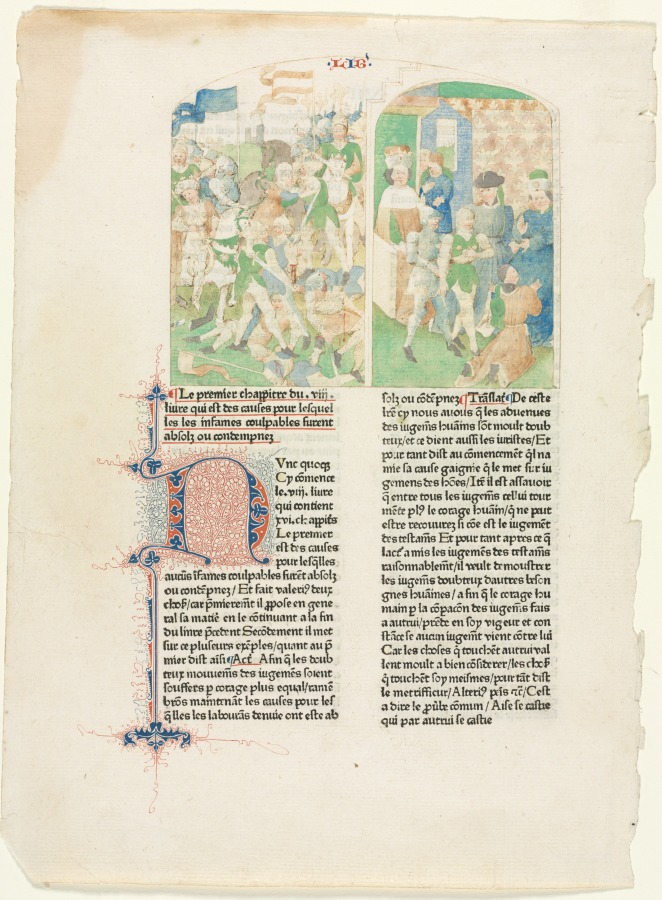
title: Opening Pages from Valerius Maximus's Facta et dicta memorabilia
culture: Flanders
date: c. 1476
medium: pen and brown ink, watercolor, and gouache; framing lines in brown ink (around image), with letterpress text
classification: Drawing